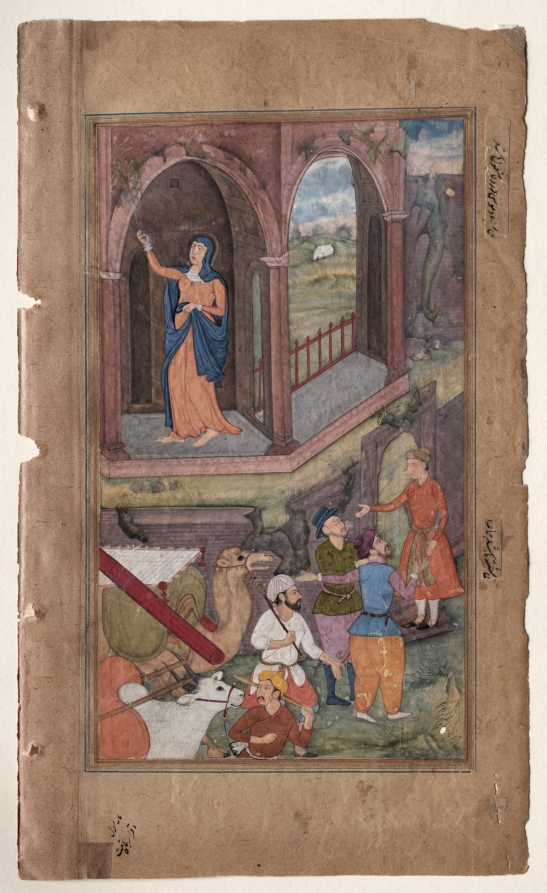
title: The place of Jesus’s birth (folio 25 recto), from a Mirror of Holiness (Mir’at al-quds) of Father Jerome Xavier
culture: Mughal India, Allahabad, made for Prince Salim (1569–1627)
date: 1602–4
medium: Gum tempera, ink, and gold on paper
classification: Manuscript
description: Instead of a stable, the artist has interpreted the place of Jesus’s birth as an abandoned ruin. Mary is cleaning it with a peacock-feather whisk, while Joseph negotiates with a man dressed in full Mughal attire at the doorway. The camel is laden with belongings and an Indian-style bed.